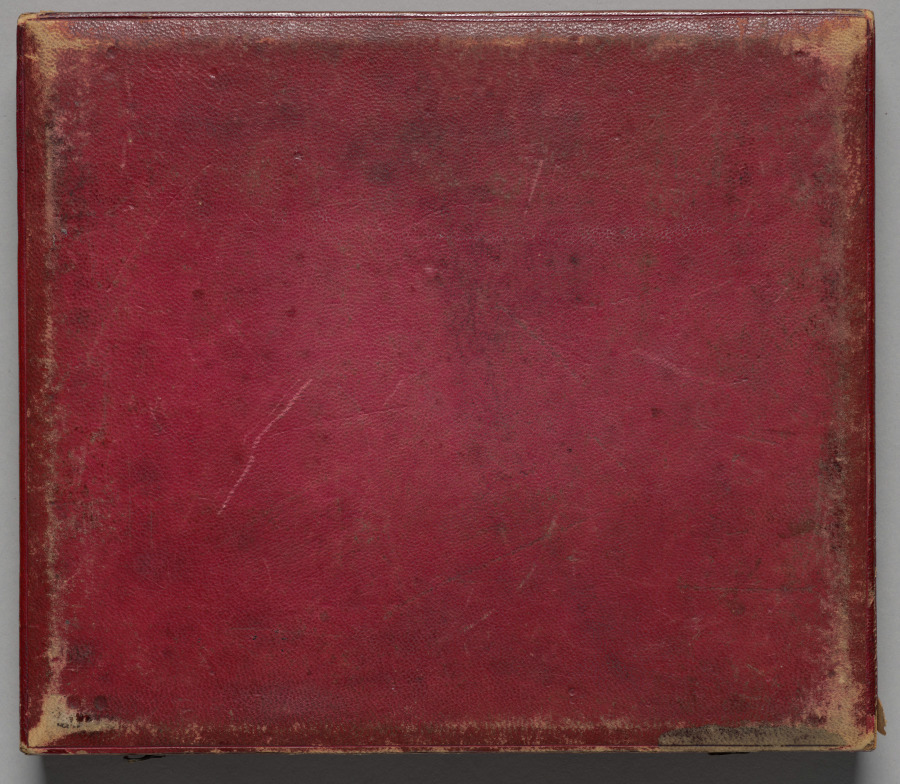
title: English family of seven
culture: England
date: c. 1840s-1850s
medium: daguerreotype, half-plate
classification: Photograph